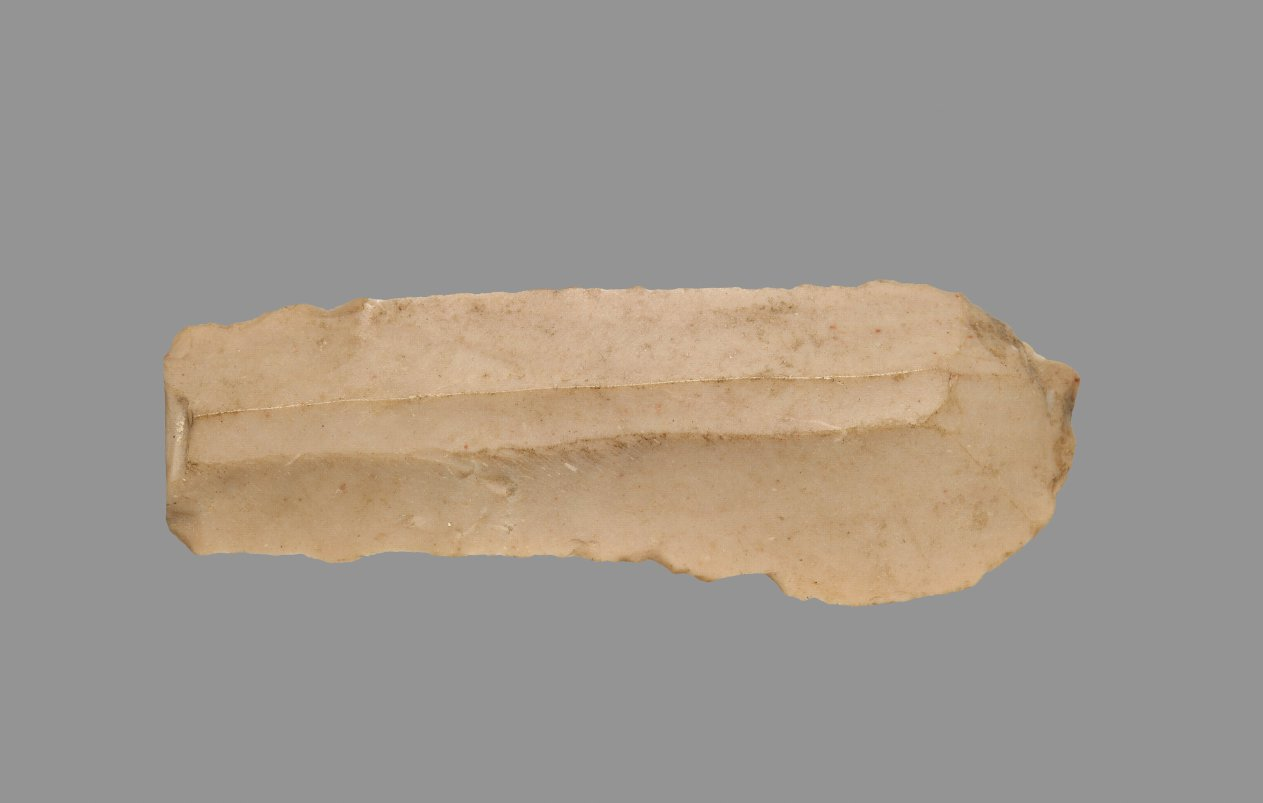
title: Sickle Blade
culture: Egypt, Middle Kingdom (2040–1648 BCE), Dynasty 12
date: 1980–1801 BCE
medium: flint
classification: Implements